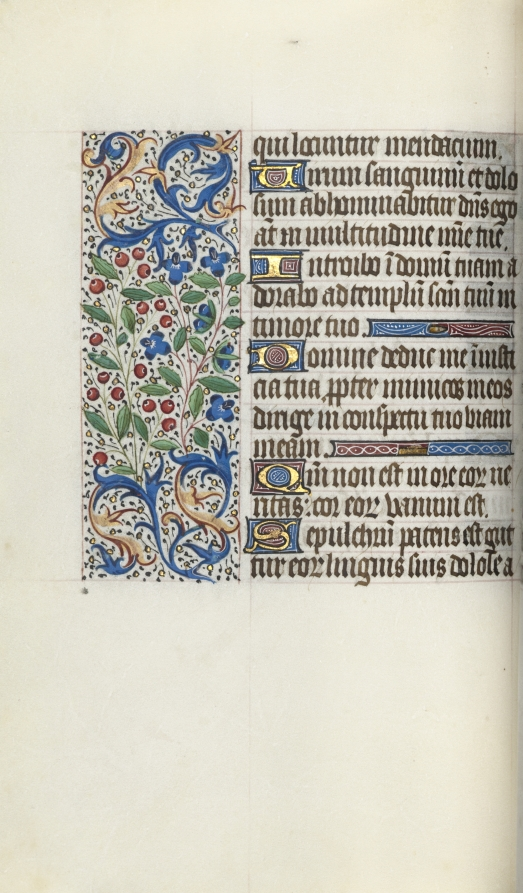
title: Book of Hours (Use of Rouen): fol. 52v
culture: France, Rouen, 15th century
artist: Master of the Geneva Latini (French, active Rouen, 1460–80)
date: c. 1470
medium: ink, tempera, and gold on vellum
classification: Bound Volume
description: In the late 1400s and early 1500s Rouen was an established and important center of book production. The city’s cathedral had a wealthy chapter that spent large sums of money to commission books and to maintain its extensive library. The stationers and booksellers would have likely been concentrated in or near the cathedral precinct. This artist, named after a manuscript now in Geneva, was Rouen’s principal illuminator during the second half of the 1400s.